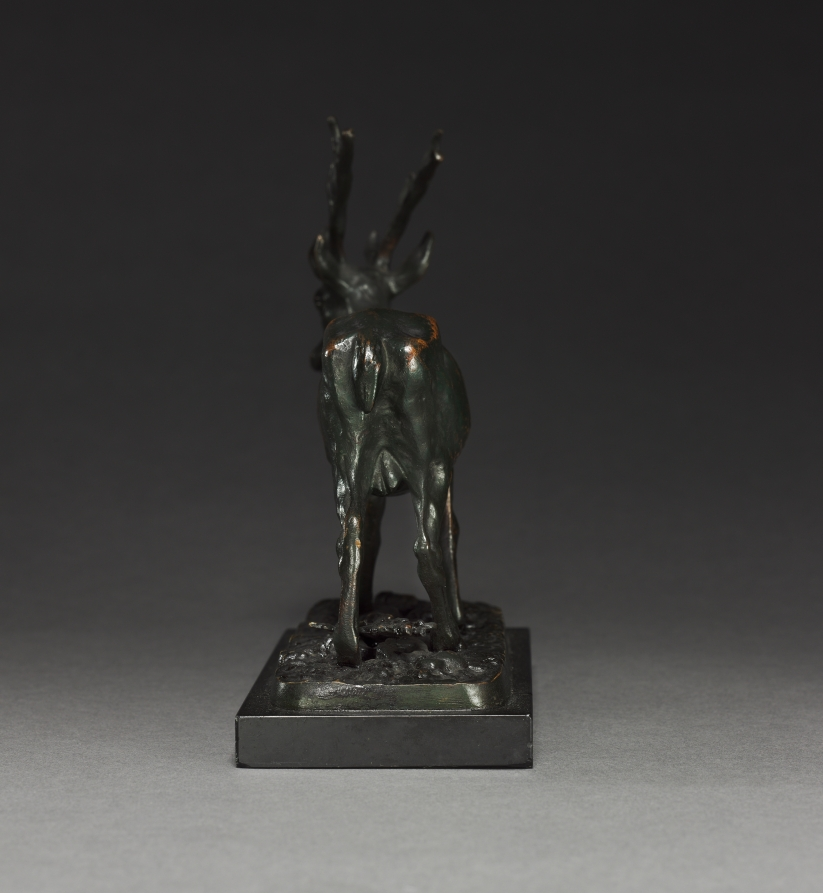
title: Deer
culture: France, 19th century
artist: imitator of Antoine-Louis Barye (French, 1796–1875)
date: after 1830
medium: bronze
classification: Sculpture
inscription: Signed: "Barye"